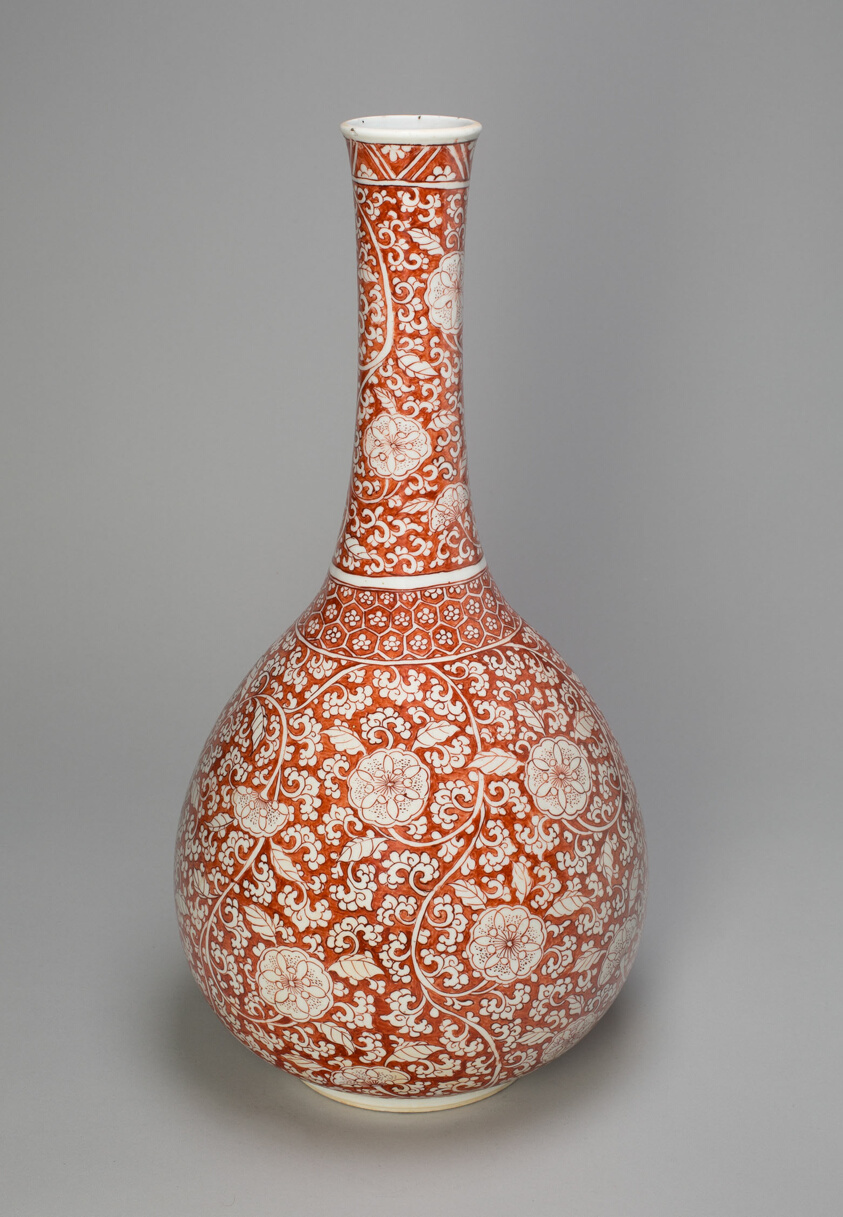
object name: Vessel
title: Large Export Copper-Red 'Floral' Bottle Vase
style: Chinese (culture or style)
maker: China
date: Qing dynasty (1644–1911)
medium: Porcelain painted in underglaze iron red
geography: China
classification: vase; vessel; asian art; ceramics